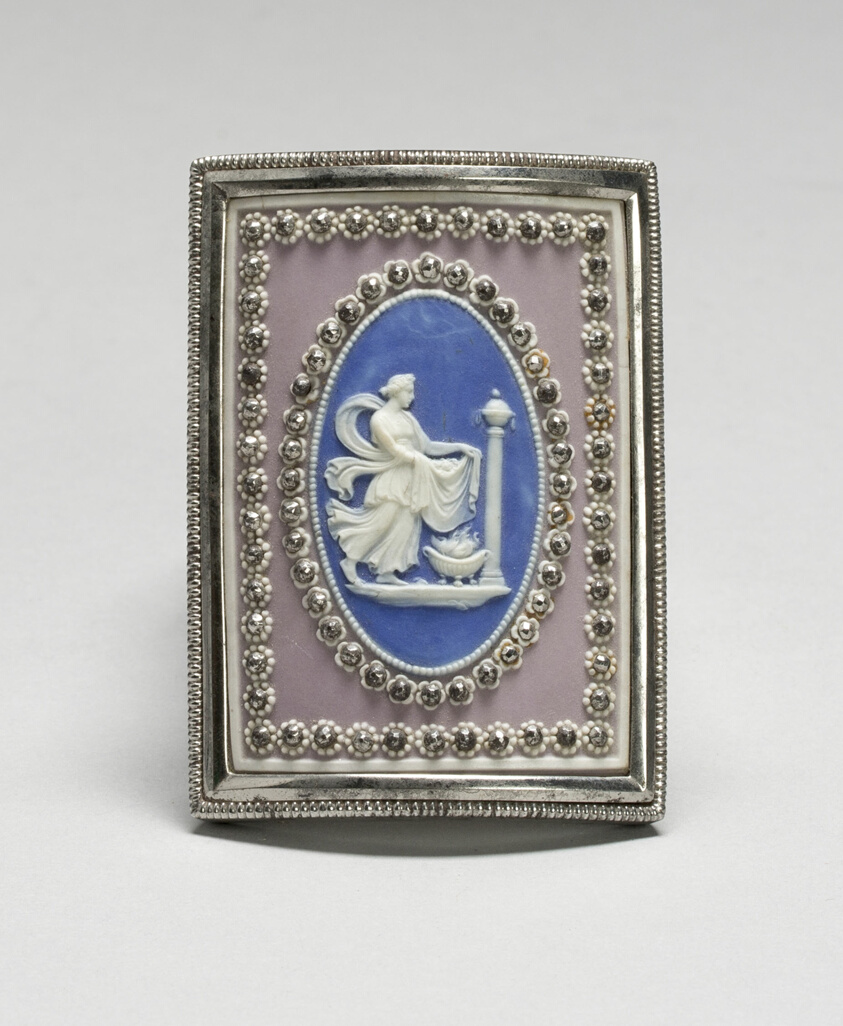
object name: Ceramics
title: Buckle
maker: Wedgwood Manufactory; England, founded 1759; Etruria, Staffordshire, England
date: 1785/90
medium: Stoneware (jasperware), cut steel frame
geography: Burslem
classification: buckle (strap accessory); accessories (object genre); costume accessory; stoneware; european decorative arts; ceramics